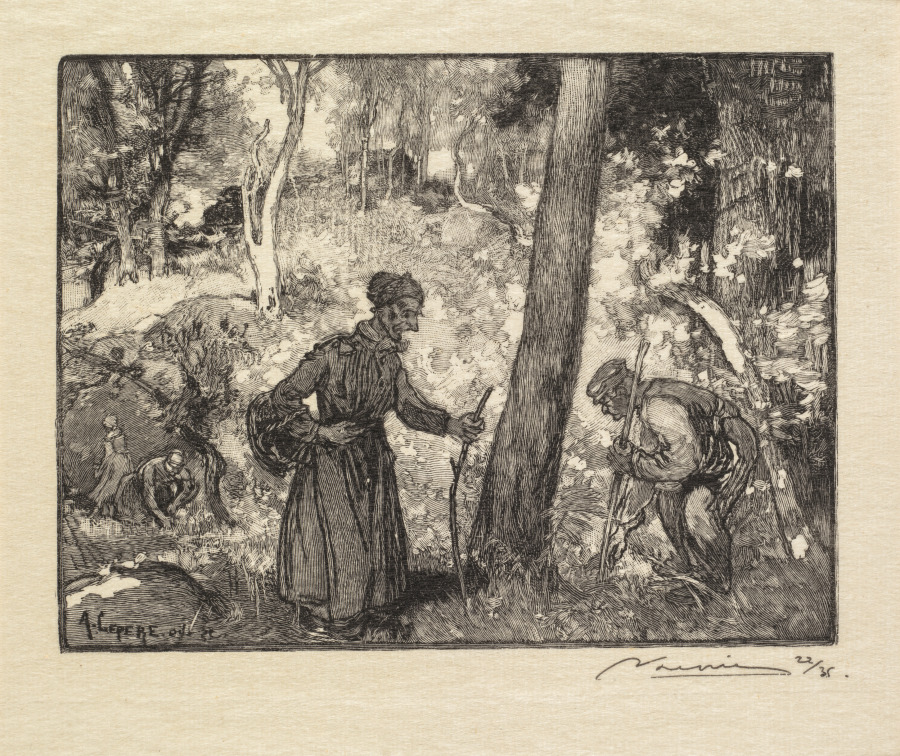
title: Fontainebleau Forest: Mushroom Hunters at the Rocher Bernard (La Forêt de Fontainebleau: Au rocher Bernard, chercheurs de champignons)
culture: France, 19th century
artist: Auguste Louis Lepère (French, 1849–1918)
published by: A. Desmoulins, Published in Revue Illustrée, 1887–90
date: 1890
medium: wood engraving from bound volume of 34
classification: Bound Volume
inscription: On block, lower right: A LEPERE Del s.c.; below image, lower right, in black ink: ALepère 22/35; on window mat, lower right, in graphite: Au rocher Bernard